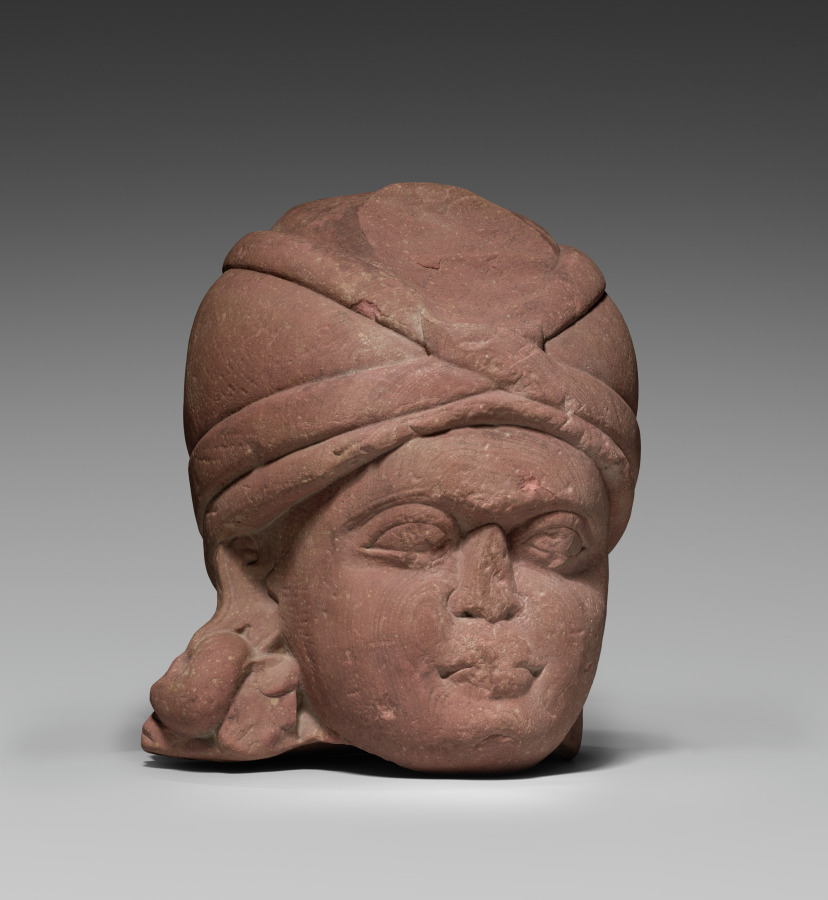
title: Head of a Yaksha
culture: Northern India, Uttar Pradesh, Mathura, Shunga period (185–78 BCE)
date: c. 125 BCE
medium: mottled red sandstone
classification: Sculpture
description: Colossal statues of yakshas, male divinities who personify the productive forces of nature, were especially popular in the northern Indian region around the ancient city of Mathura. They were installed in shrines in parks and gardens, often associated with extraordinary trees. The red sandstone is from a nearby quarry, called Sikri.